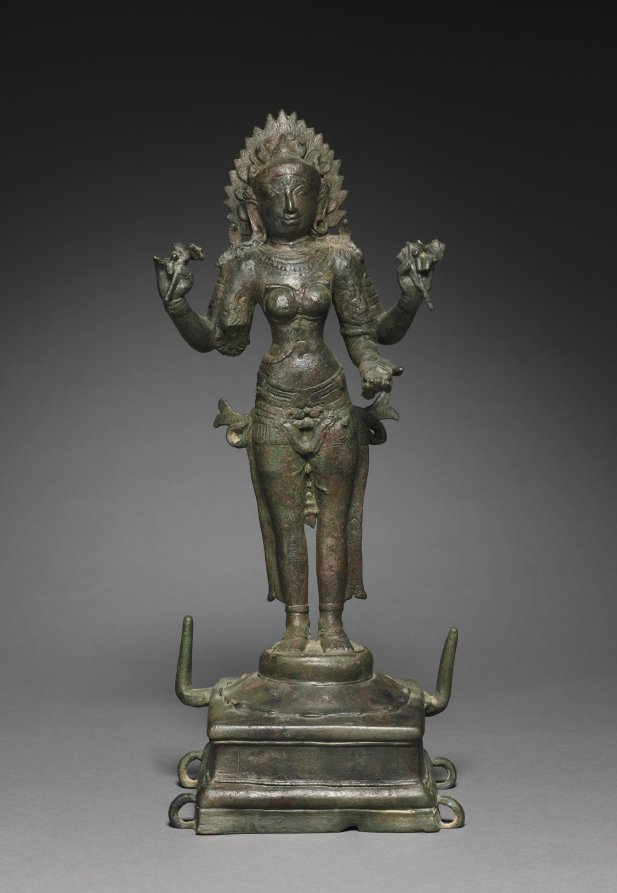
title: Kali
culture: South India, Tamil Nadu, Chola period (900-13th century)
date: 900s–1000s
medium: bronze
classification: Sculpture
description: The female aspect of Shiva, the goddess Parvati, has her own cycle of myths, and she herself emanates into different forms. Some branches of Hinduism consider the goddess to be the supreme creator divinity herself, who generated all the other gods, including Shiva. This bronze sculpture could have been affiliated with either branch. Kali is the wrathful form of the goddess generated in the midst of a battle with a demon that the gods failed to conquer. Kali was to drink his blood before any drop fell to ground, or else a new demon would instantly be generated. The demons are metaphors for human vices, such as egotistic pride and arrogance.